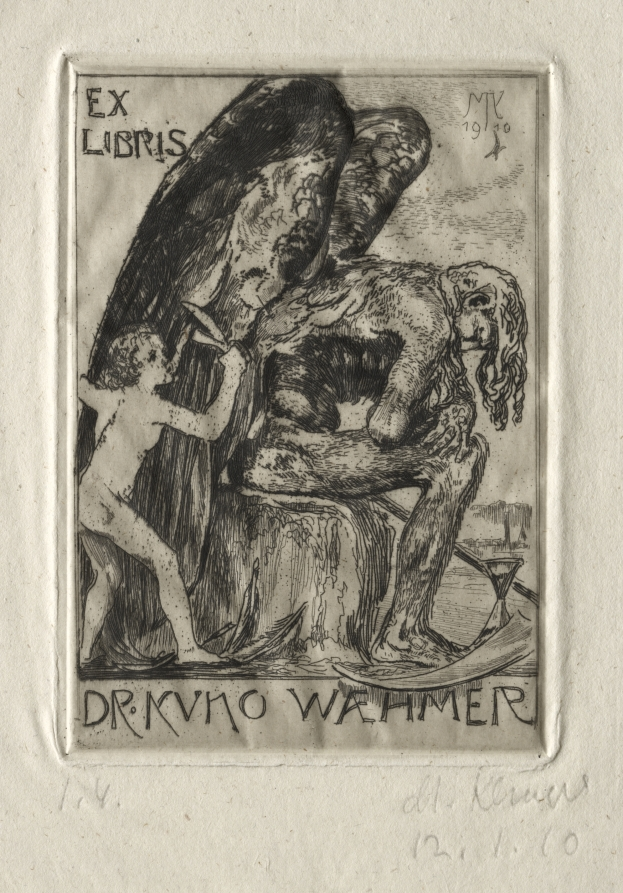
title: Ex Libris Dr. Kuno Waehmer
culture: Germany, 20th century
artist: Max Klinger (German, 1857–1920)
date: 1910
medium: etching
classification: Print